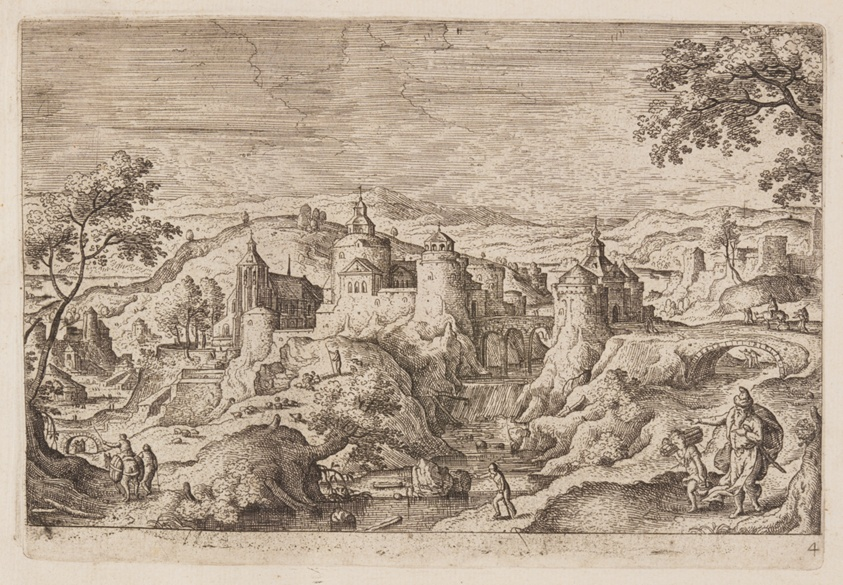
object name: Print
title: Plate 4, from Landscapes with Scenes from the Old and New Testament and Ovid’s Metamorphoses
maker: Hans Bol (Flemish, 1534–1593); published by Philip Galle (Flemish, 1537–1612)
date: 1574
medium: Etching on ivory laid paper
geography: Flanders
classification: print; paper; prints and drawing; etching